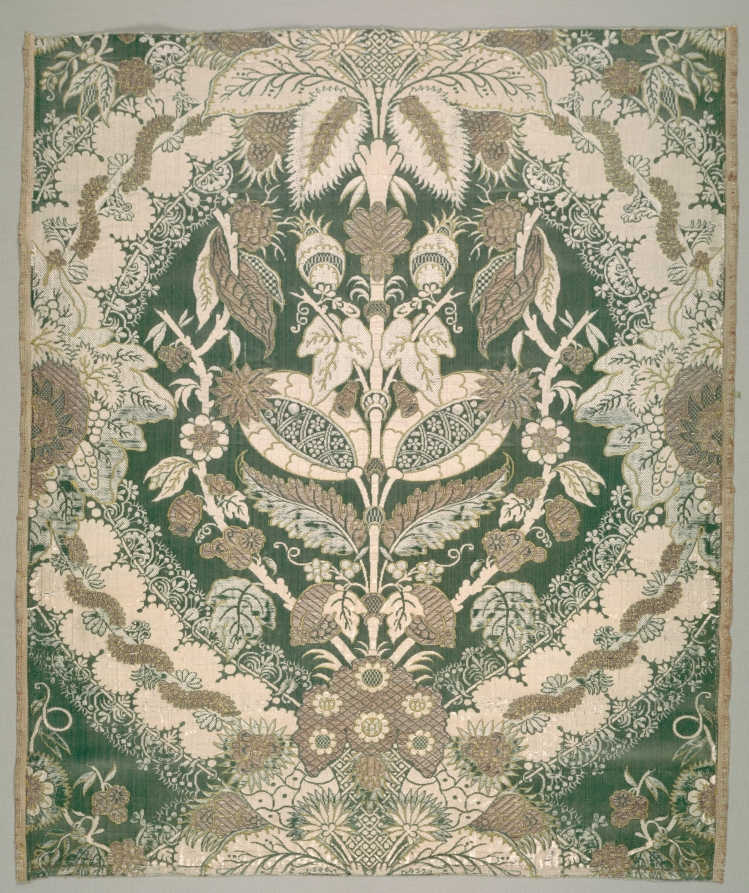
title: Textile Fragment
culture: France, 18th century, late Baroque period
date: c. 1720–1750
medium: lampas weave; silk and silver thread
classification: Textile